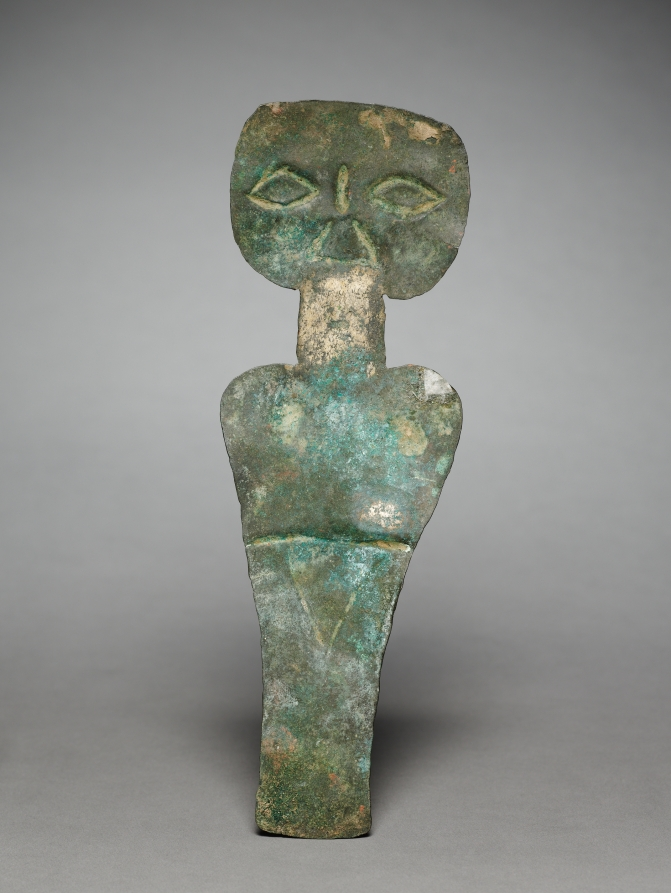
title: Funerary Female Figure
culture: Peru, South Coast, Chincha-Ica Valley area, 15th-16th century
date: 1200–1500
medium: hammered silvered copper, cinnabar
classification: Jewelry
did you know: The red pigment on the face is cinnabar, a mineral consisting of mercury sulfide.